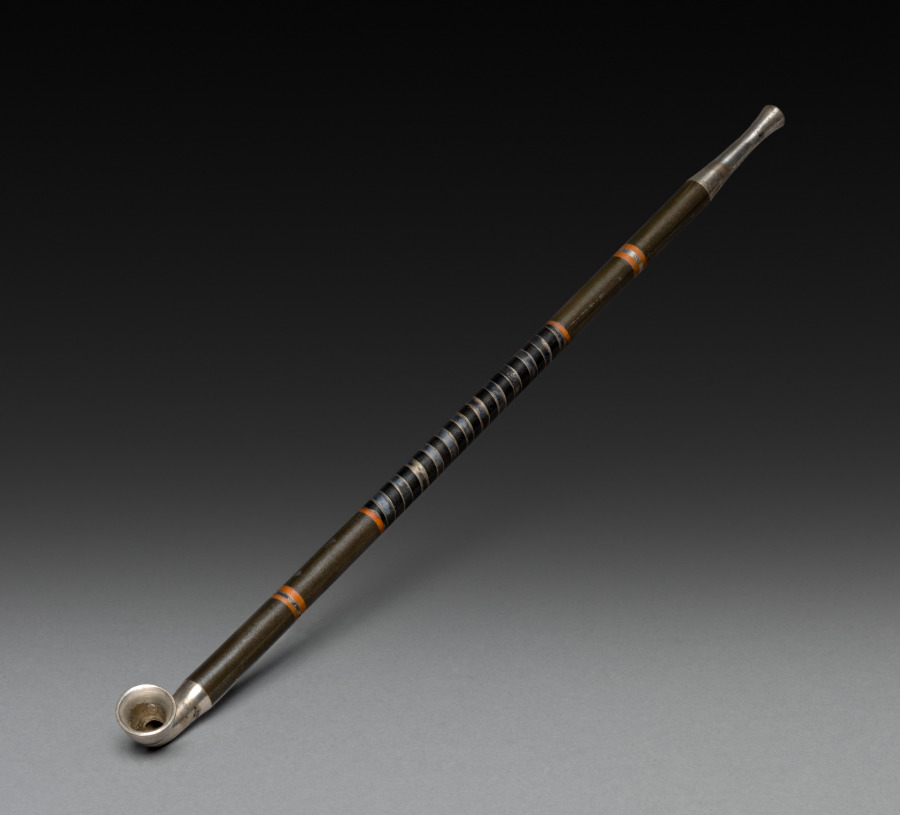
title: Tobacco Pipe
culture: Japan, Edo period (1615–1868)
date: 1700s to mid-1800s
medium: metals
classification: Miscellaneous